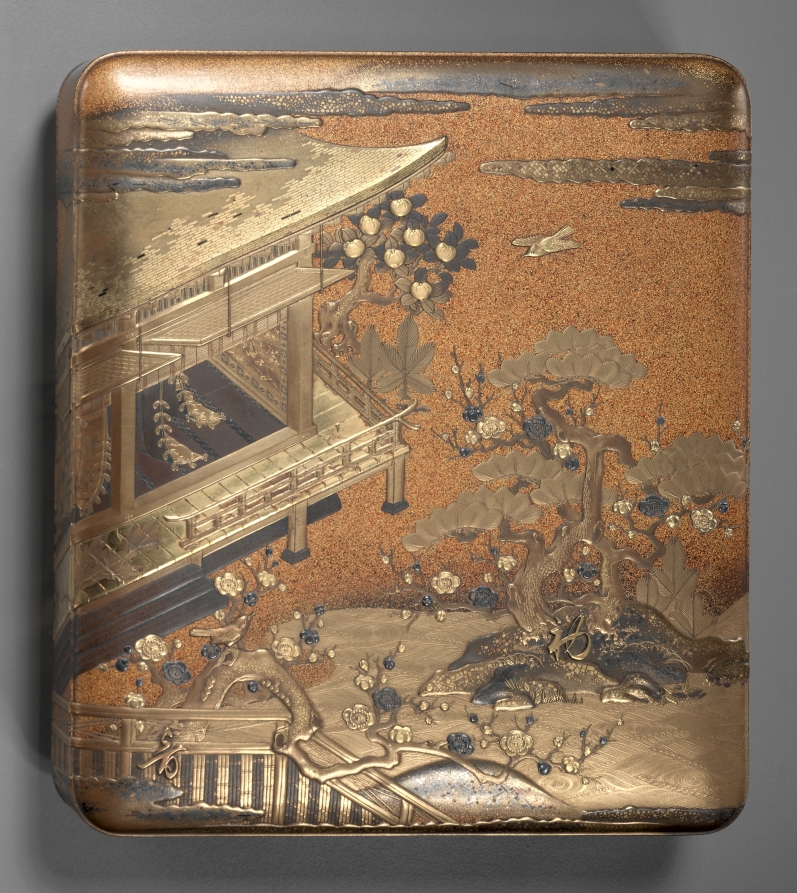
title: Writing Box (Suzuribako) with the “First Song” (Hatsune) Chapter from the Tale of Genji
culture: Japan, Meiji period (1868–1912)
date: early 1900s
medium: Lacquered wood with gold and silver sprinkled powder (maki-e), foil application (kirikane), and metal inlay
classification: Lacquer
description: The design of this box was inspired by an object in the 1639 lacquer wedding set of Chiyohime, the daughter of the shogun (ruler). Information about the set became available in the Meiji period, leading some lacquer artists to emulate its designs. This box features a scene from the chapter “First Song” (Hatsune) of the Tale of Genji, in which Prince Genji and his love Murasaki enjoy her garden. It incorporates the written characters for “first” (初, hatsu) and “sound” (音, ne), indicating the first song of the warbler in spring, associated with the new year—the water dropper for mixing the ink is in the shape of this bird.